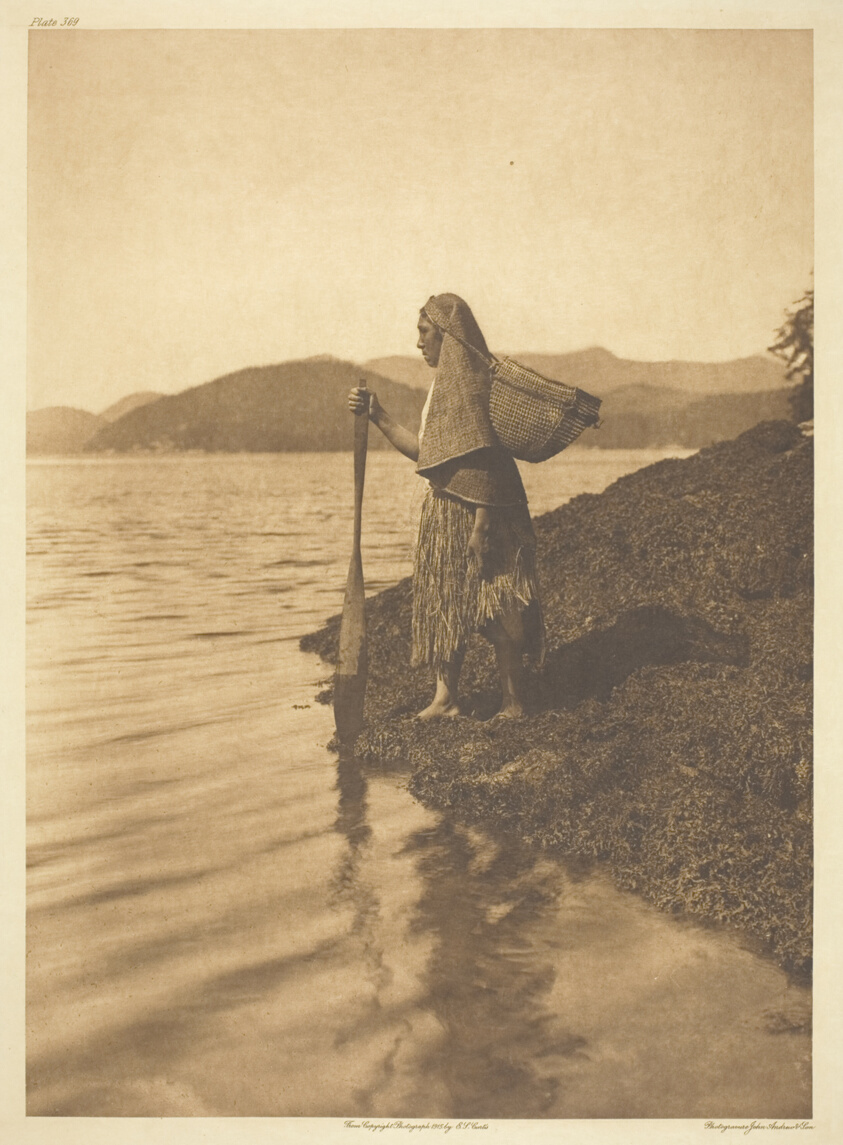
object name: Photograph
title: The Seaweed Gatherer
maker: Edward S. Curtis (American, 1868–1952)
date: 1915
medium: Photogravure, plate 369 from "The North American Indian, Volume 11" (1916)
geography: United States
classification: photogravure; photomechanical process; photography; photograph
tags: portraits, portraits: female subject, photography, portraits: Native American subject